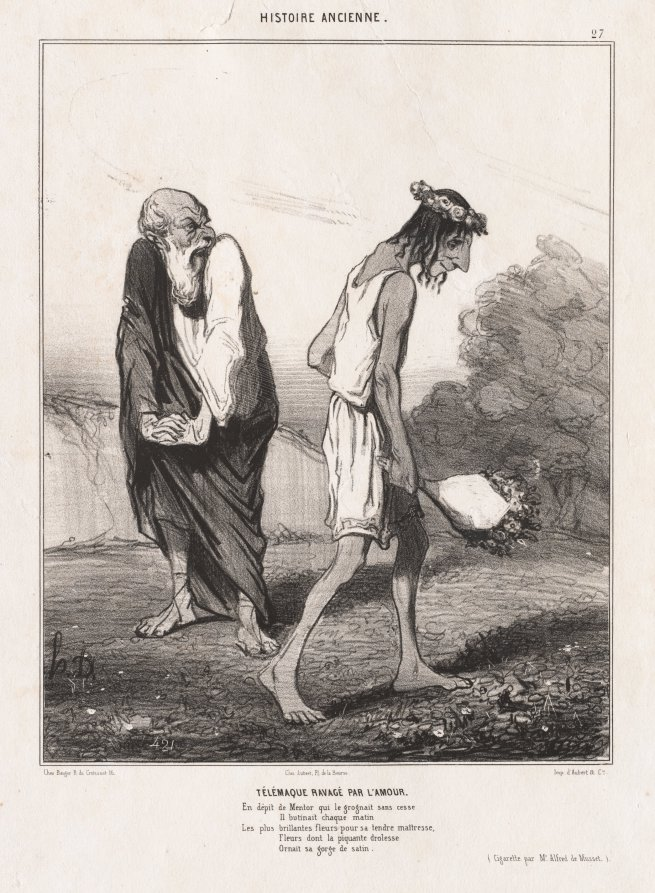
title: Telemachus Ravaged by Love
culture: France, 19th century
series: Ancient History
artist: Honoré Daumier (French, 1808–1879)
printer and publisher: Aubert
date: 1842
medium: lithograph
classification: Print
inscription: Above image, printed: HISTORIE ANCIENNE. / 27 ; below image, printed: TÉLÉMAQUE RAVAGÉ PAR L'AMOUR. / En dépit de Mentor qui le grognait sans cesse / Il butinait chaque matin / Les plus brillantes fleurs pour sa tendre maîtresse, / Fleurs dont la piquante drolesse / Ornait sa gorge de satin. / (Cigarette par Mr. Alfred de Musset).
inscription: Lower margin, printed: Chez Bauger R. du Croissant 16. / Chez Aubert, Pl. de la Bourse / Imp. d'Aubert & Cie.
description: This print was published in Le Charivari (October 9, 1842) as plate 27 from the series Ancient History.